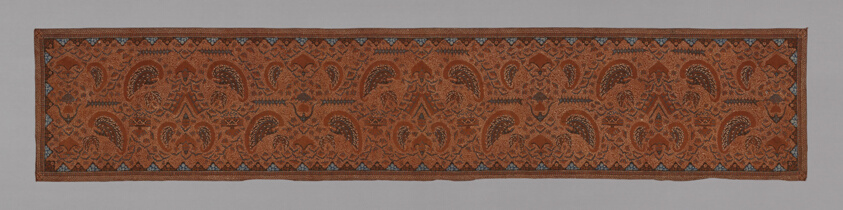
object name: Textile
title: Slendang (Shawl)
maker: Indonesia, Central Java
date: 19th century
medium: Cotton, batik dyed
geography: Java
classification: textile; weaving; costume; dress (garment); clothing